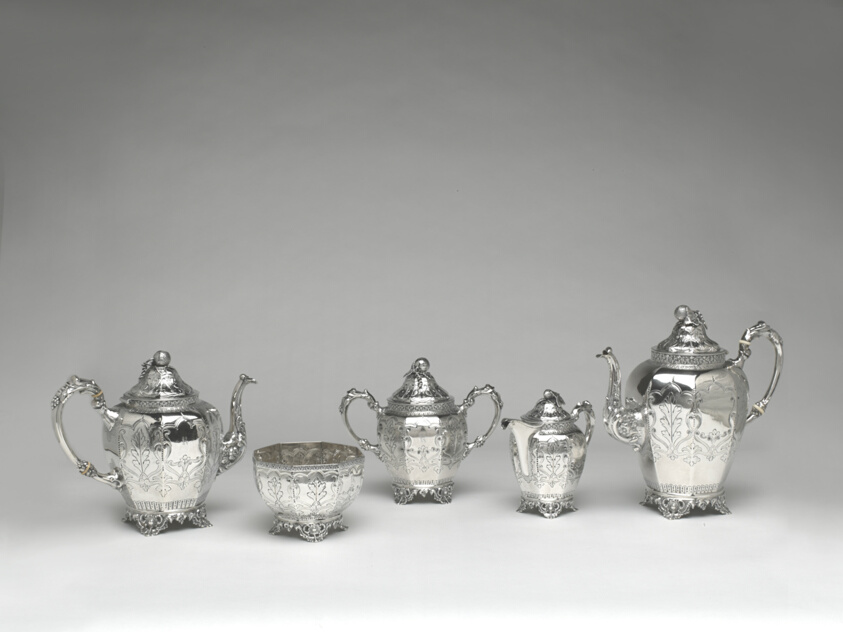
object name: Metalwork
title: Creamer (part of a set)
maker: J.T. and E.M. Edwards; American, 1852–1864; Chicago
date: 1852–64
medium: Silver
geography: Chicago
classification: creamer; silver; american decorative arts; american arts; decorative arts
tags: Chicago